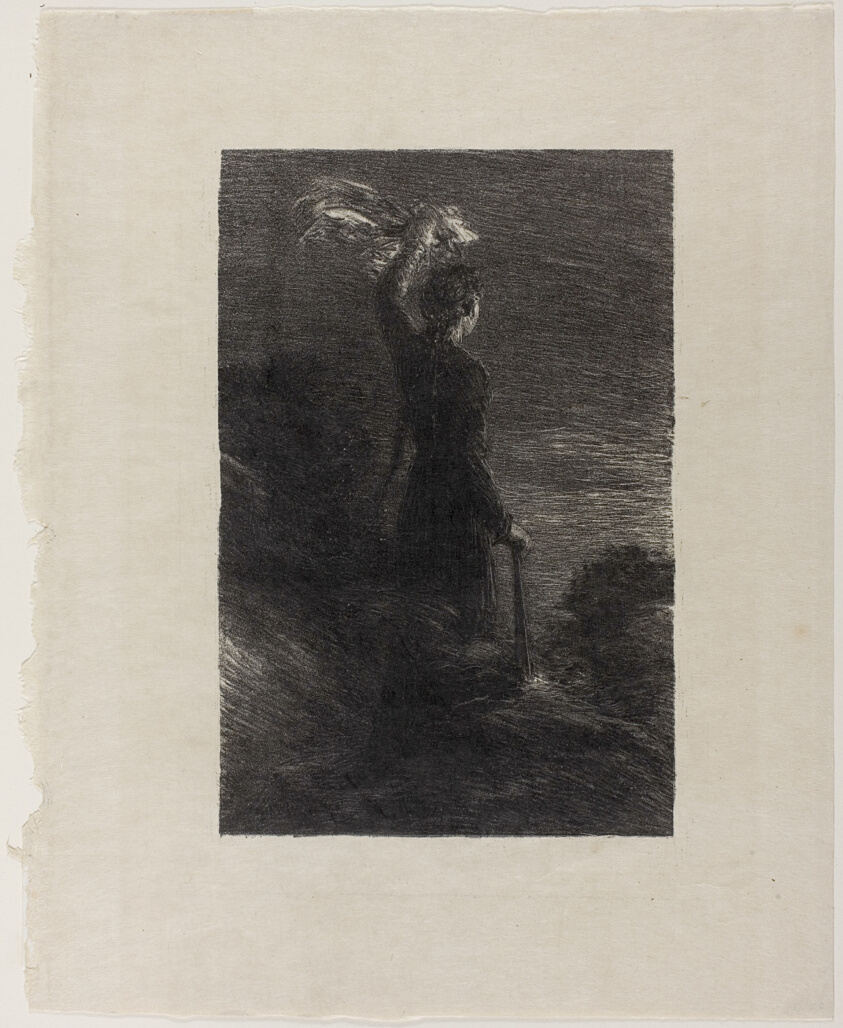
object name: Print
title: Tristan and Isolde, Act II: Signal in the Night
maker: Henri Fantin-Latour (French, 1836-1904)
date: c. 1886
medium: Lithograph on cream Japanese paper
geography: France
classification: lithograph; print; prints and drawing